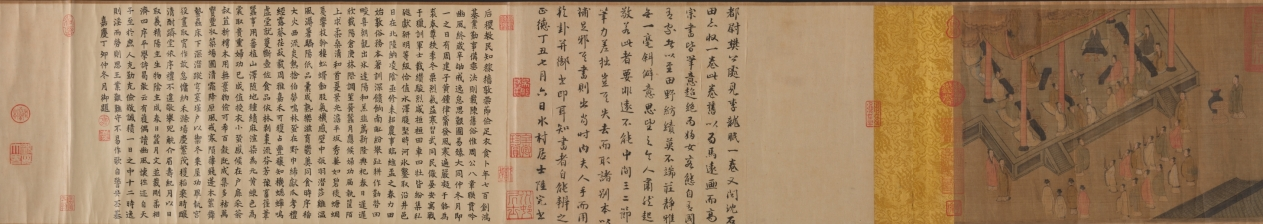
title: "Seventh Month" from the Odes of Bin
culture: China, Southern Song dynasty (1127-1279)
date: 1200s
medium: Handscroll; ink and color on silk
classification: Painting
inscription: Colophons: 1. [on the frontispiece] by the Qianlong emperor (dated 1741). 2. by Lu Wan (dated Zhengde dingchou, 1517). 2. by the Jiaqing emperor (dated 1807).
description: According to Confucian thought, the ruler looks after the well-being of his people which involves agricultural activities. Seventh Month from the ancient Odes of Bin in the Shijing (Book of Poetry) describes occupations throughout the year, including plowing, harvesting, hunting, making clothes, and observing rituals. The earliest illustrations of these Odes accompanied by text were commissioned by Southern Song emperor Gaozong (reigned 1127–1162). As the lower Yangzi delta had become the new seat of government, Gaozong had sets of these illustrations produced by court artists to revive the dynasty and convince the Confucian officialelite of his legitimacy to rule.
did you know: The Odes of Bin appears in the classic Shijing (Book of Poetry), an anthology of more than 300 poems, folk songs, and ceremonial hymns that were originally chanted to music.